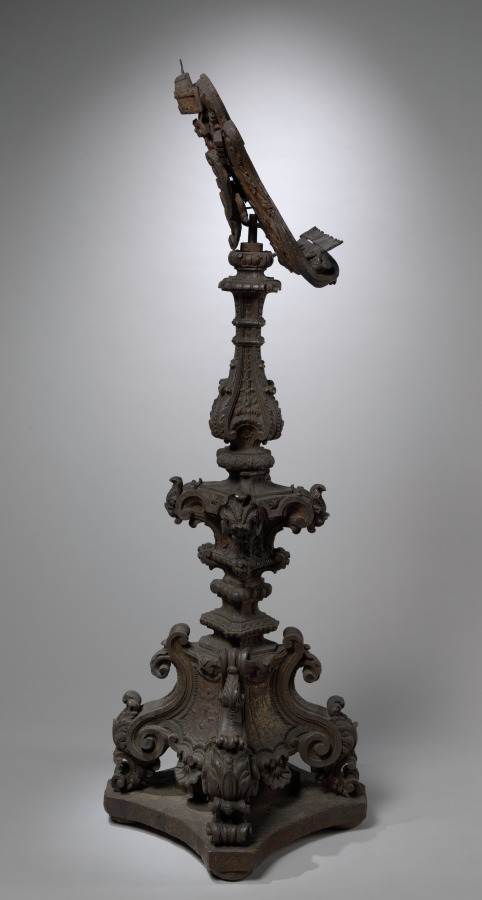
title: Lectern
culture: Italy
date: 1707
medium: wood and gesso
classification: Furniture and woodwork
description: Lecterns of this type were used in Roman Catholic churches and monastery chapels to hold the Bible, from which a priest would read the lessons of scripture and at some points during the liturgy, guide the participants in prayer. The high degree of decoration was achieved by applying plaster gesso to the wooden base allowing for elaborate carving in the same way that a picture frame is worked. Sometimes lecterns bearing the arms of a pope or cardinal like this one were gifts to mark the visit or favor of that official.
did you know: The carved coat of arms on the lectern desk are those of Pope Clement XI, who reigned from 1700 to 1721.